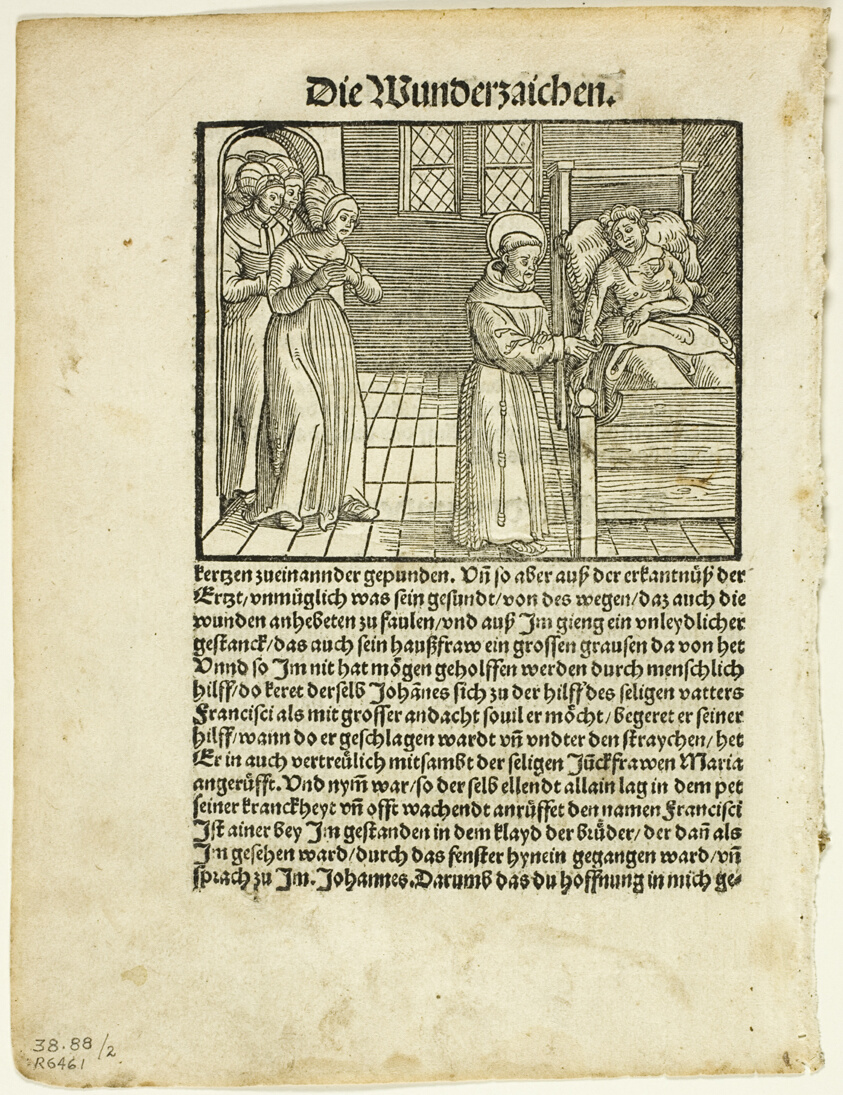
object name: Print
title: Saint Francis Heals the Grievous Wounds of One John at Lerida, plate two from Woodcuts from Books of the XVI Century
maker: Hieronymus Höltzel (German, flourished 1500-1525); after Wolf Traut (German, 1480-1520); assembled by Max Geisberg (Swiss, 1875-1943)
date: 1512, assembled into portfolio 1937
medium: Woodcut on paper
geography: Germany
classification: woodcut; print; prints and drawing